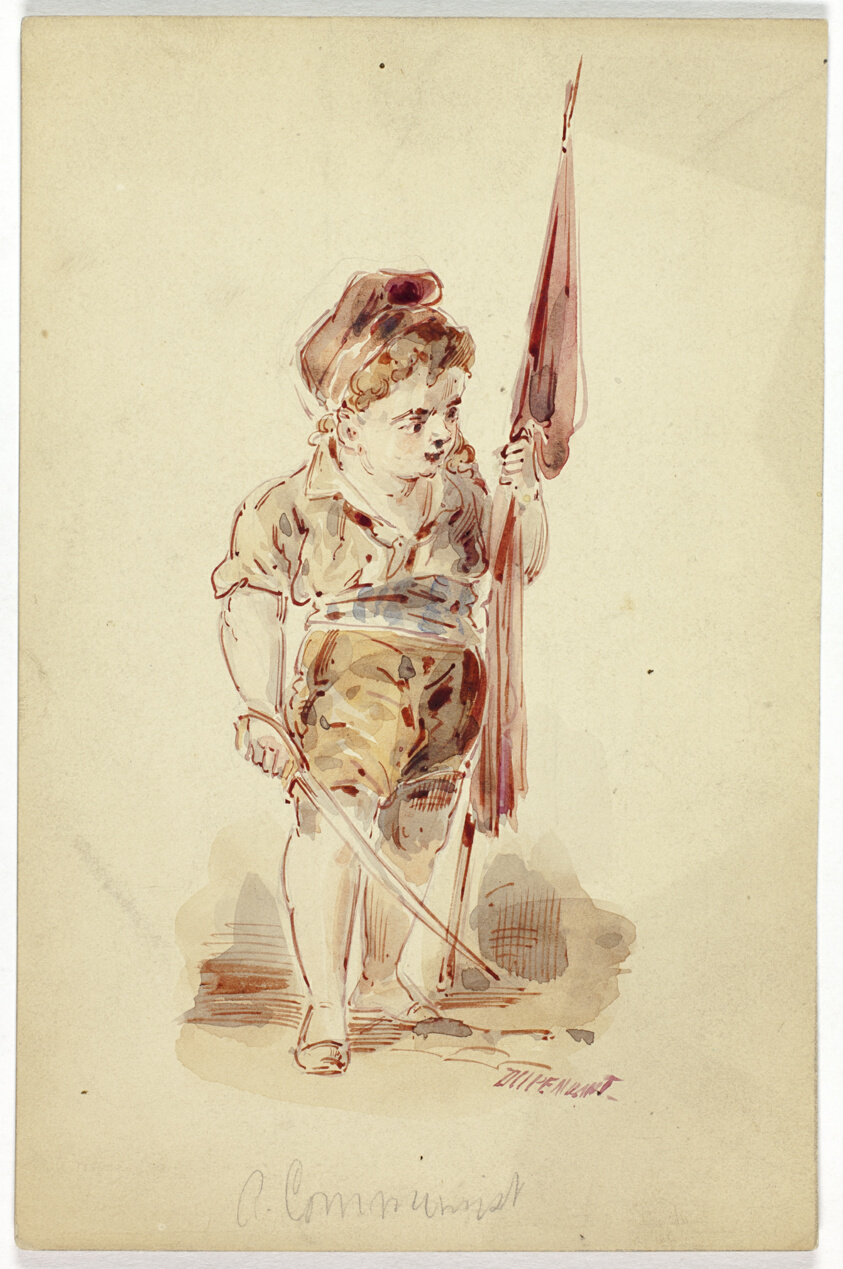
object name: Drawing and Watercolor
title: Flagbearer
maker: Dupenvant; French, 19th century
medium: Pen and red ink and watercolor, over traces of graphite, on cream board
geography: France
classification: watercolor; drawings (visual works); prints and drawing